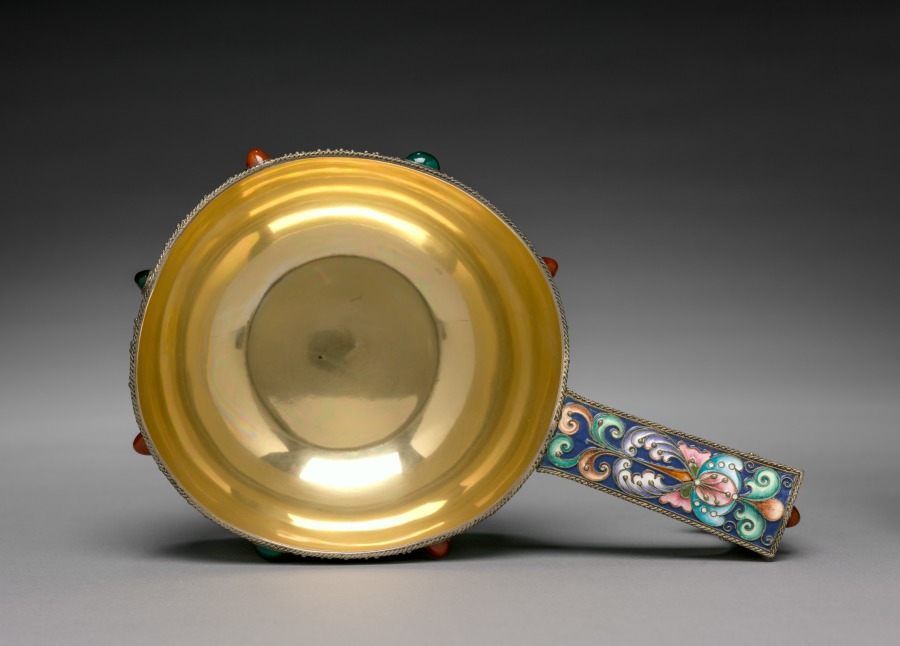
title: Kovsh (Wine Vessel)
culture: Russia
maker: House of Fabergé (Russian, 1842–1918)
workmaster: attributed to Feodor Ivanovich Rückert (Russian, 1840–1917)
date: 1896–1906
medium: silver gilt, enamel, cabochon gems, chrysoprases, carnelians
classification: Miscellaneous